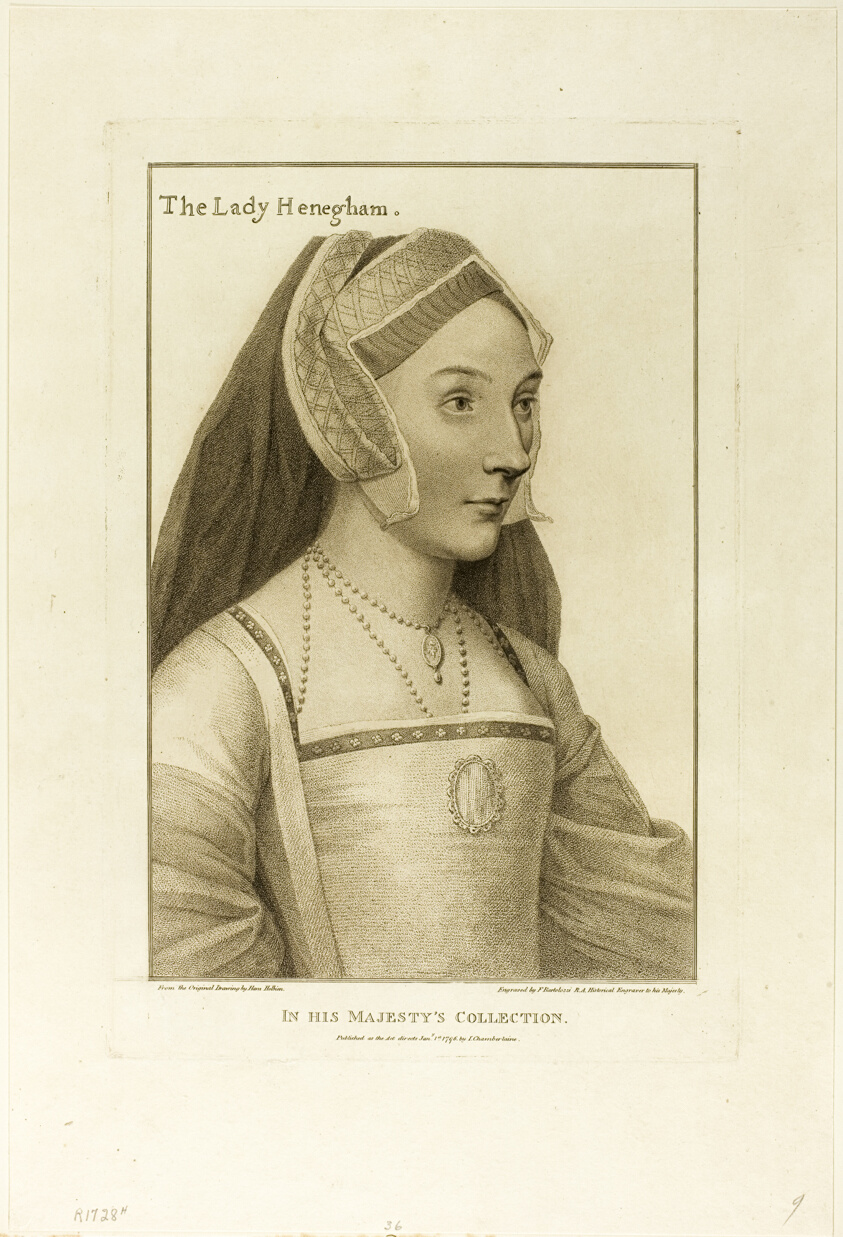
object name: Print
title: The Lady Henegham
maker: Francesco Bartolozzi (Italian, 1727-1815); after Hans Holbein the younger (German, 1497-1543)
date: January 1, 1796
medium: Stipple engraving on ivory wove paper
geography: Italy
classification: engraving; print; prints and drawing